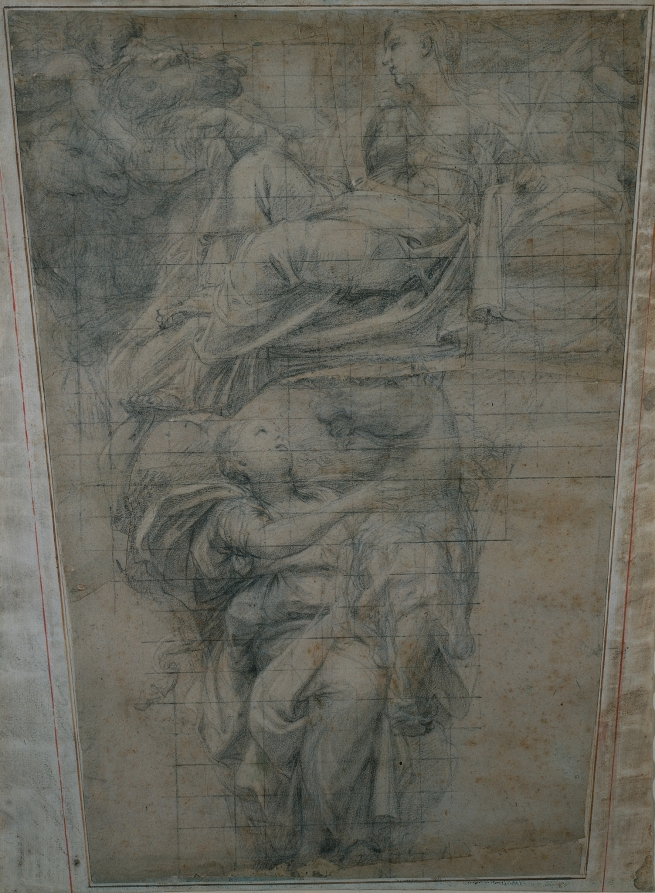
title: Temperance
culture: Italy, 17th century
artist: Domenichino (Italian, 1581–1641)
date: 1628–30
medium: black chalk heightened with white chalk, squared with black chalk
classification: Drawing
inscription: verso of secondary support, lower left, in graphite: I. 1081 [circled]; lower center, in graphite: ? [Pelio?] [Candio?]; lower center, in graphite: 204.; lower center, in graphite: From the coll of Lord Barrymore; verso of secondary and tertiary supports, lower right, in graphite: Carlone (Carlo) Scaria 1686-1776 / Design for a Sculpture / Black Crayon; verso of tertiary support, lower right, in graphite: [illegible]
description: The gridded pattern superimposed over the figures in this scene indicates that this drawing was used a preparatory study for one of Domenichino’s frescoes depicting the four cardinal virtues inside the dome of the Church of San Carlo ai Catinari in Rome. This technique—called squaring—was a common method used in seventeenth-century Italy to transfer a design from one surface to another. Domenichino prepared the design on three separate sheets of paper, all with irregular edges cut and pasted onto a larger sheet. At the top, the allegorical figure of Temperance, one of four cardinal virtues, reclines gracefully on a cloud. She holds a palm branch in her left hand and extends her right out toward a hovering putto in the upper left corner. The changes made to Temperance’s right hand and the presence of two camel heads (only one appears in the finished fresco) reveal the artist’s process for working out the poses and placements of the figures in his composition.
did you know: Despite having carefully prepared the composition for his fresco of Temperance with this and other drawings, Domenichino left Rome before completing the painting. It was later finished by one of his pupils.